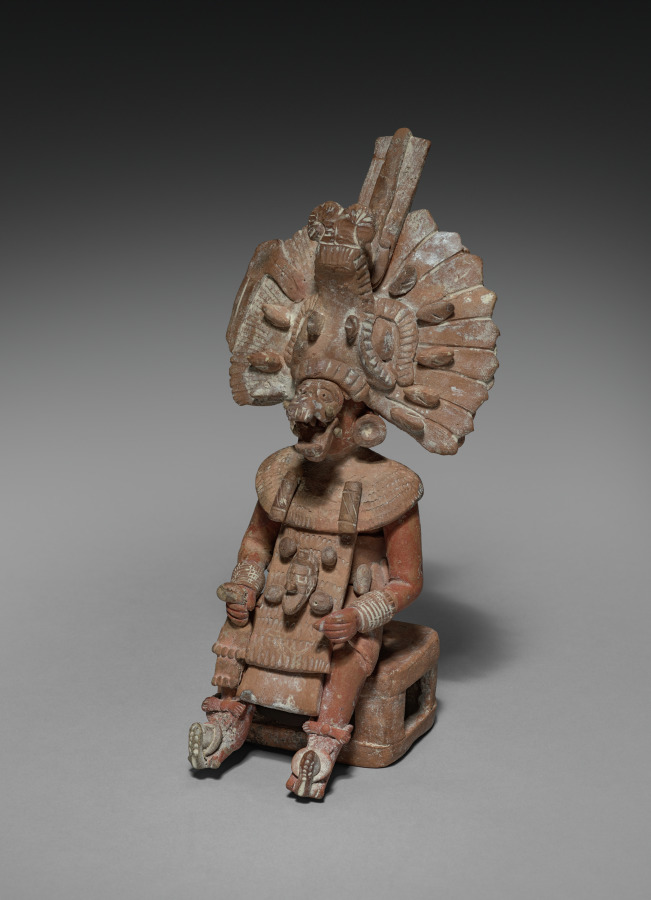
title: Seated Lord with Removable Headdress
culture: Mesoamerica, Maya, probably Jaina Island, Late Classical period, 7th-9th century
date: 600–800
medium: ceramic and slip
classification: Ceramic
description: The major Maya grave offerings on Jaina Island were ceramic figurines that depict deities and humans in a variety of roles. The standing figure represents a warrior who once probably held weapons and wears either quilted cotton armor or the feathered uniform of a military order. The seated figure also represents a male, perhaps another warrior, who wears a huge zoomorphic headdress. A skeletal face with articulated jaw descends from the headdress to fit as a mask over the figure’s face.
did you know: It is estimated that some 20,000 people were buried on the tiny island of Jaina over a 500-year period.